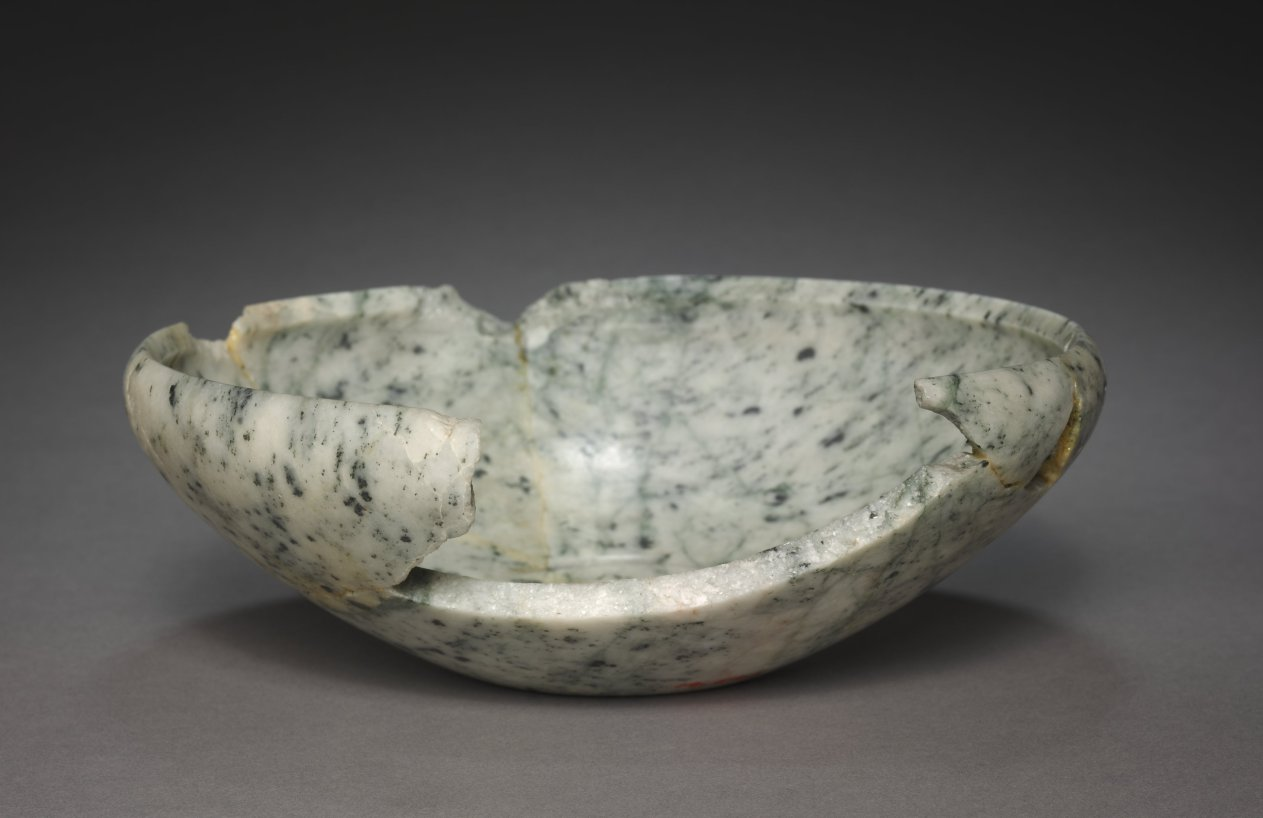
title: Dish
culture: Egypt, Early Dynastic (2950–2647 BCE), Dynasties 2–3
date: 2770–2573 BCE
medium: anorthosite gneiss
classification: Vessels